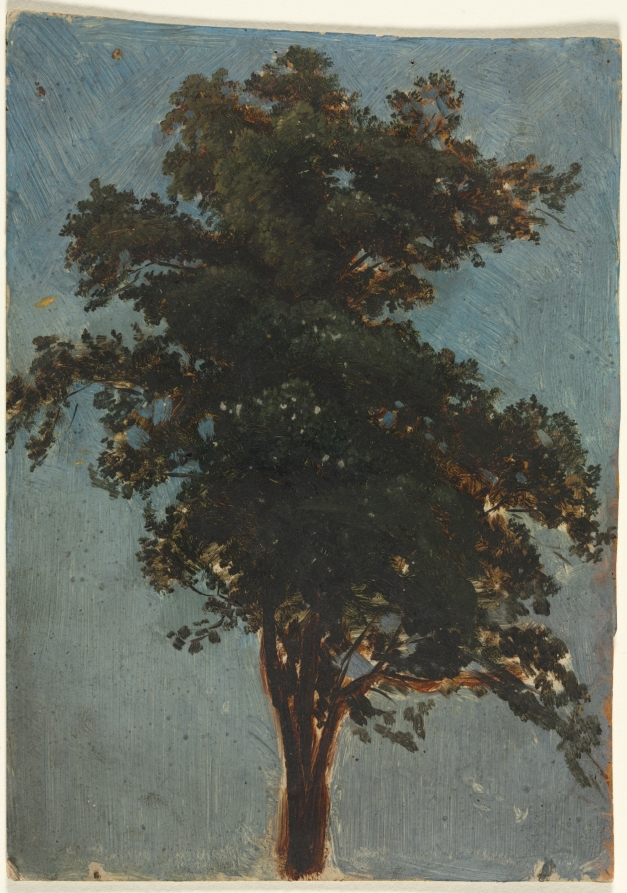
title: Tree Study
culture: Switzerland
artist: attributed to Alexandre Calame (Swiss, 1810–1864)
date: c. 1830–64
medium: oil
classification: Drawing